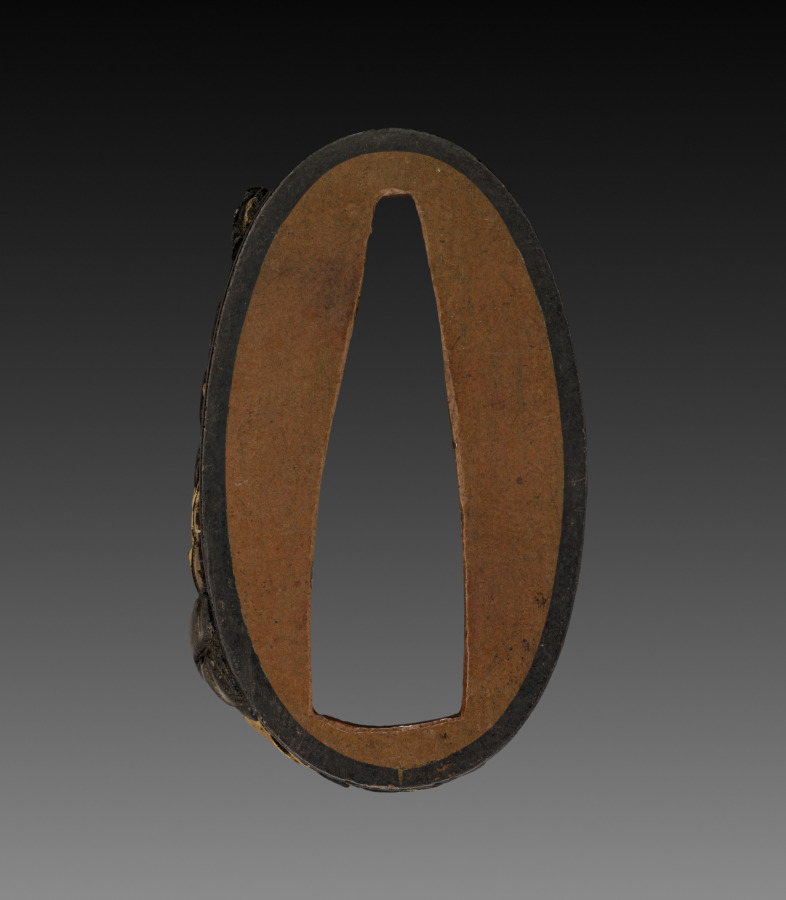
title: Sword-Hilt Collar (Fuchi)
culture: Japan, Edo period (1615–1868)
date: 1700–1850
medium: shakudo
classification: Arms and Armor